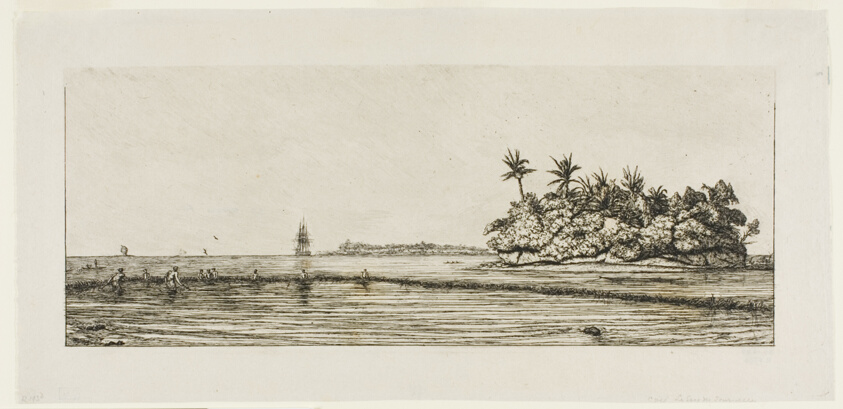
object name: Print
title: Oceania: Fishing, Near Islands with Palms in the Uea or Wallis Group, 1845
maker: Charles Meryon (French, 1821-1868)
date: 1863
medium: Etching and drypoint on grayish-ivory laid paper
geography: France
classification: etching; print; prints and drawing